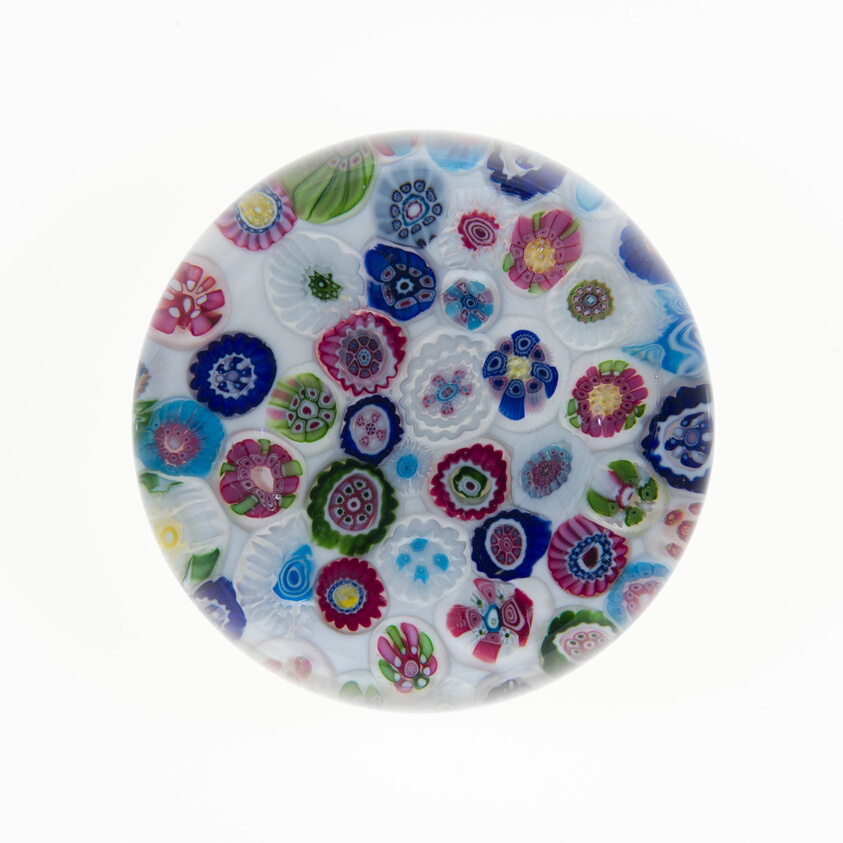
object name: Glass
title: Paperweight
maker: Clichy Glassworks (Cristalleries de Clichy); Clichy, France, 1837-1885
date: 19th century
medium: Glass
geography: Clichy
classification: paperweight; millefiori; european decorative arts; glass